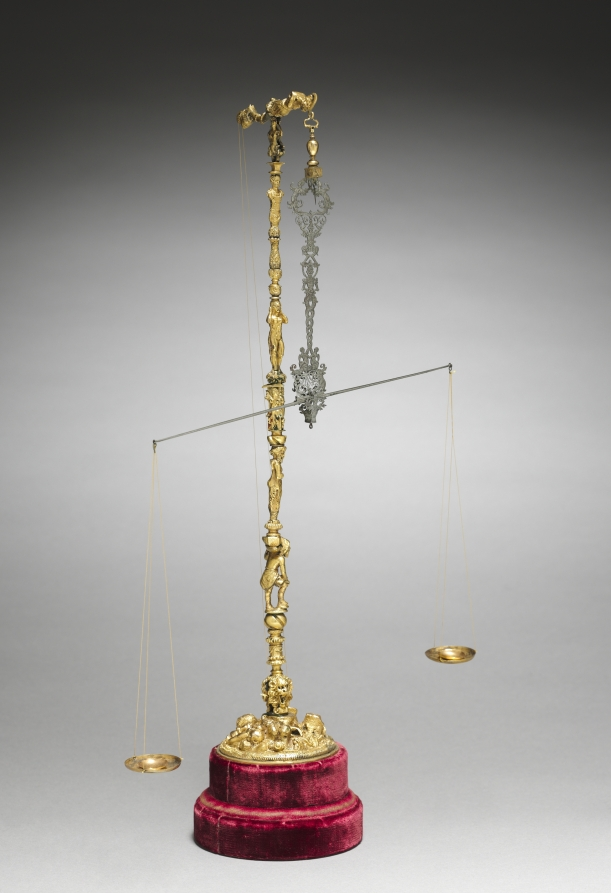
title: Scales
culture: Germany, Nuremberg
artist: workshop of Wenzel Jamnitzer I (German, 1508/09–1585)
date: c. 1525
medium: gilt bronze and silver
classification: Metalwork